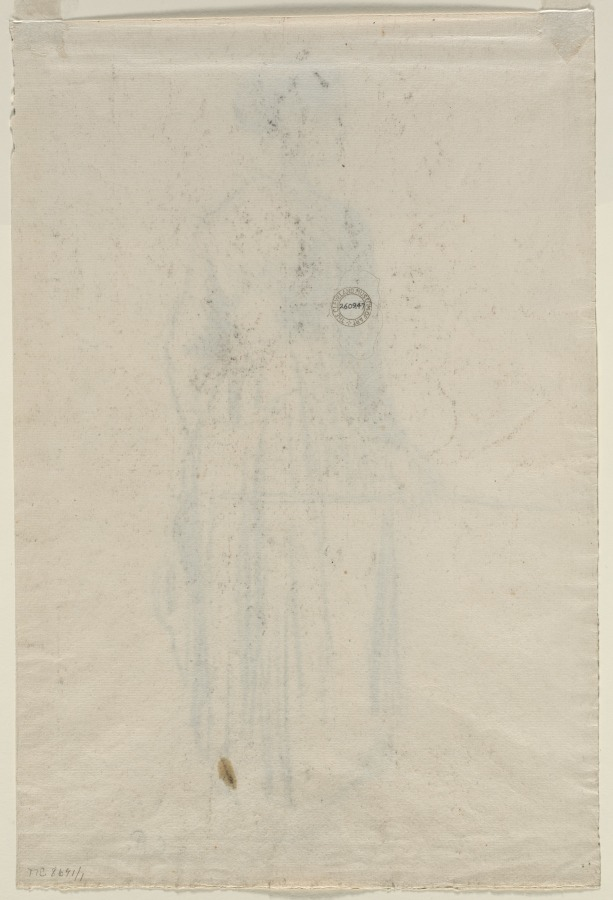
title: The Cowherdess, Eragny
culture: France, 19th century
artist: Camille Pissarro (French, 1830–1903)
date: 1886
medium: crayon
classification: Drawing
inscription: lower left, in blue crayon: 39A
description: This drawing of a peasant girl seen from the back with her bodice cinched at the waist was a study for a figure who appeared in an oil painting, Vachère à Eragny, 1886, and later in a watercolor of a fan painted in 1890. In a letter to his son, Pissarro mentioned being particularly pleased with the figure.